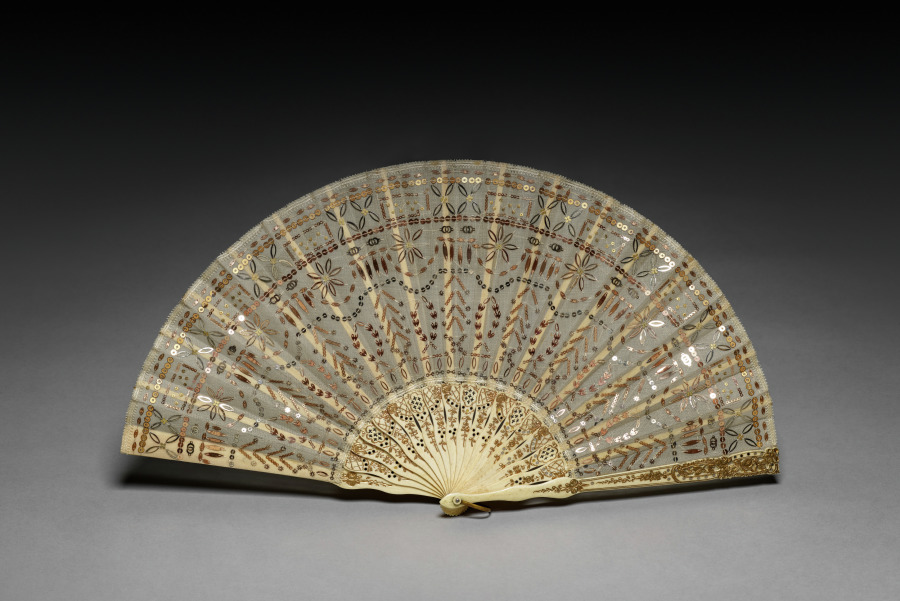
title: Fan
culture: 19th century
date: 1800s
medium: bone with gold paint, nickel (?) plated brass inlays, gauze with gold and silver colored sequins, copper alloy ring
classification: Miscellaneous